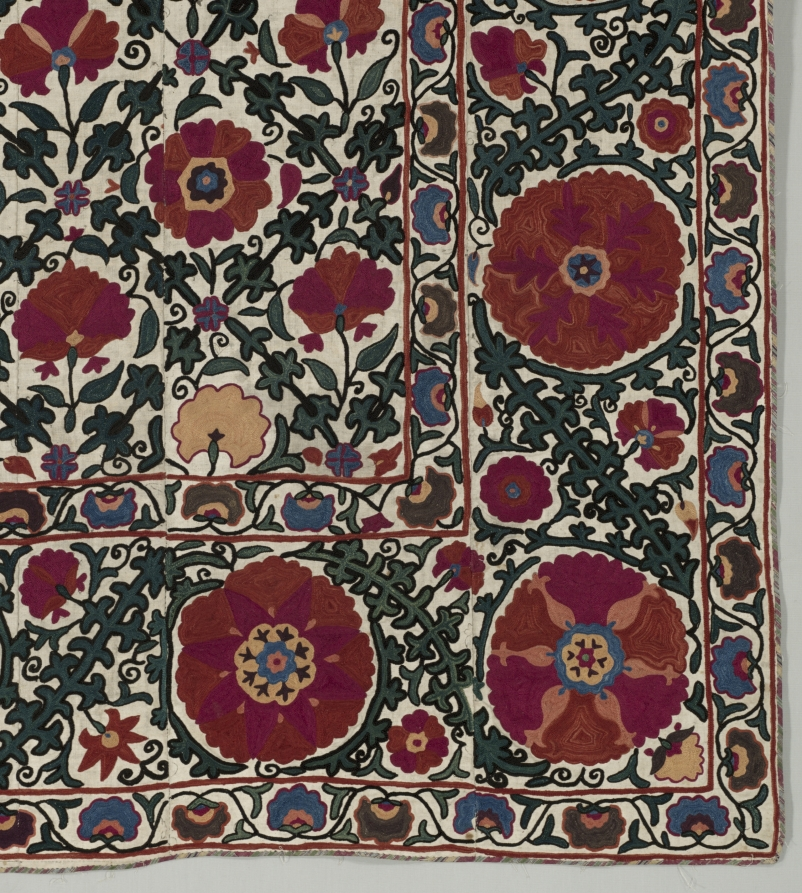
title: Wall Hanging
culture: Uzbekistan, Bukhara or Shahr-i Sabz, 19th century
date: 1850–1899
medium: Silk, cotton; plain weave, embroidery, tambour chain stitch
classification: Embroidery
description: Embroideries known as suzani, after the Persian and Tajik word for needle (suzan), feature bold floral and foliate motifs enriched with several shades of red and crimson silk thread. This example suggests a lush garden enriched with single flowering plants alternating with a bird’s-eye view of blossoms in a foliate diamond trellis. Either a skilled family member or a professional drew the pattern in black ink (still visible) on five loosely joined cotton cloths; female family members disassembled them for stitching and reassembled them upon completion. Suzanis were made in many towns, generally with distinctive artistic and technical characteristics.